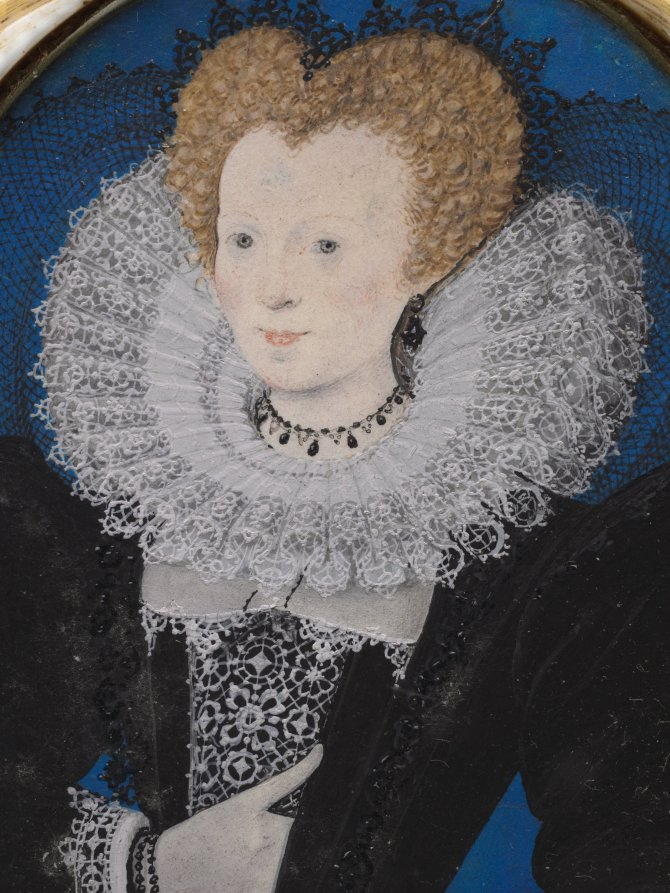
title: Portrait of a Woman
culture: England, 16th century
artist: studio of Nicholas Hilliard (English, c. 1547–1619)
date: 1590s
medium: watercolor on vellum in original turned ivory case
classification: Portrait Miniature